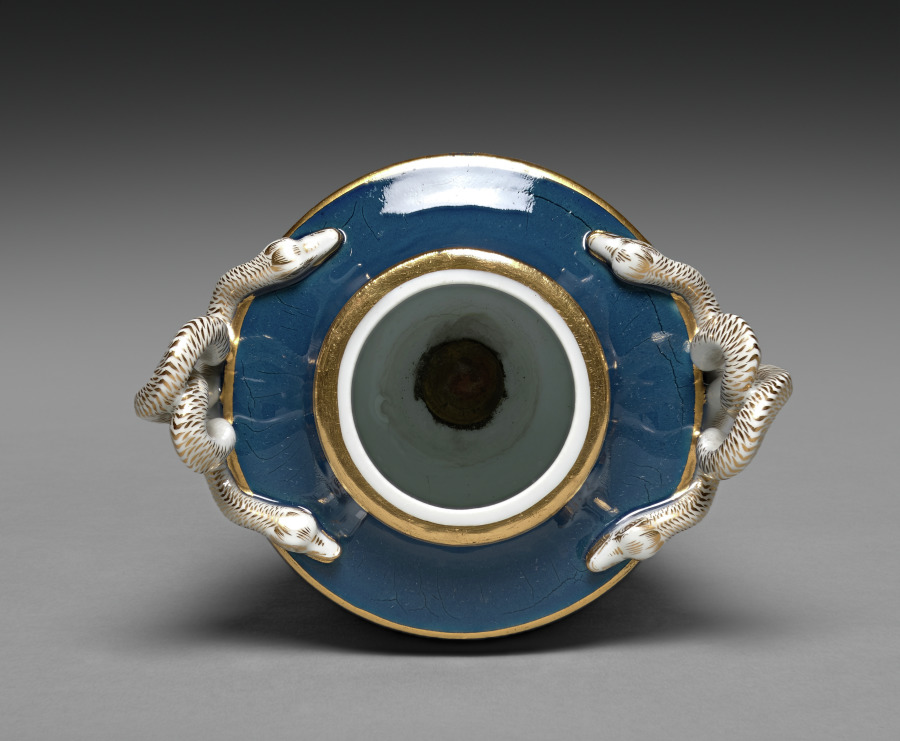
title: Vase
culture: Germany, 19th century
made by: Meissen Porcelain Factory (German, est. c. 1710)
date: 1881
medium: porcelain with pâte-sur-pâte decoration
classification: Ceramic